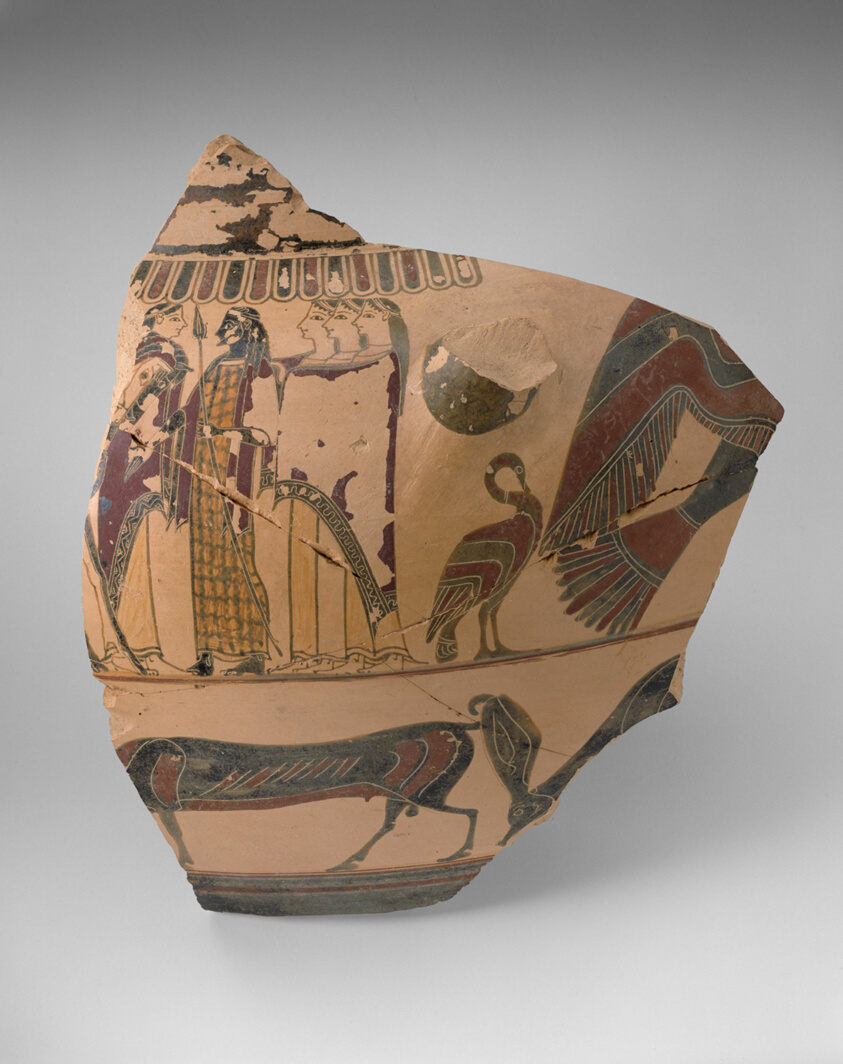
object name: Vessel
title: Fragment of a Column Krater (Mixing Bowl)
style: black-figure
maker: Attributed to the Cavalcade Painter; Greek; Corinth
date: 580-570 BCE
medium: terracotta, black-figure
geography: Corinth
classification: vessel; ancient art